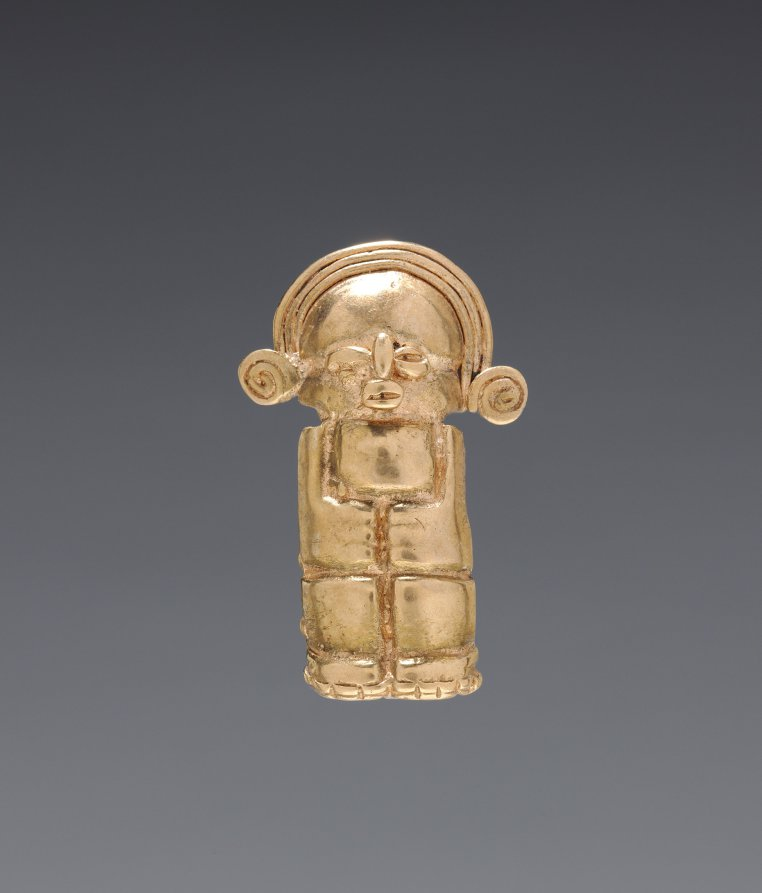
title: Necklace Figurine Bead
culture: Colombia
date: 1–700 CE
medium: cast gold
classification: Jewelry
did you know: Working with gold dates back to at least 500 BC in Ecuador and Colombia.